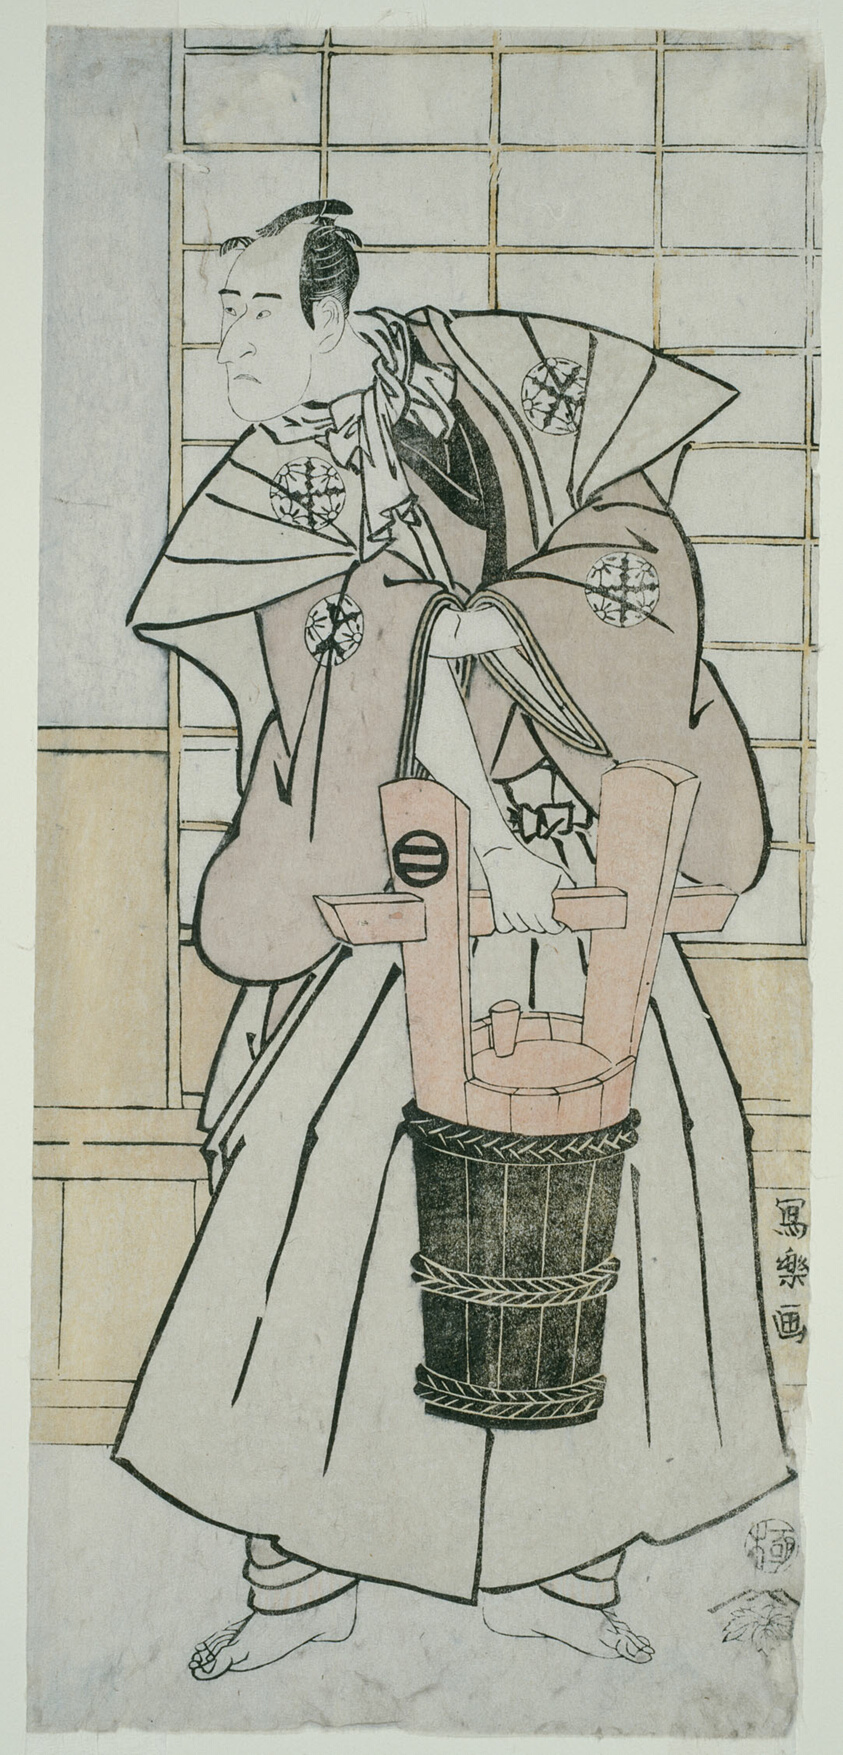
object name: Print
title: The Actoe Ichikawa Komazo llI as Nitta Yoshisada, Actually Oyamada Taro Takaie (Sandai-me Ichikawa Komazo no Nitta Yoshisada, jitsuwa Oyamada Taro Takaie)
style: Japanese (culture or style)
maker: Toshusai Sharaku 東洲斎 写楽; Japanese, active 1794-95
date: 1794 (Kansei 6)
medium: Color woodblock print; hosoban, nishiki-e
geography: Japan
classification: woodblock print; print; asian art